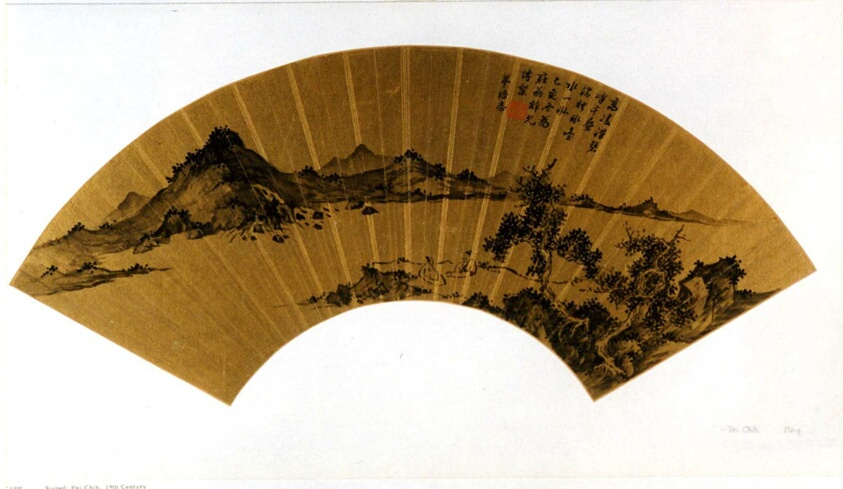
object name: Painting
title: Landscape 山水扇面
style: Chinese (culture or style)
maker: Attributed to Pei Zhi 培志 (Chinese, 17th century)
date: Ming dynasty (1368–1644), 17th century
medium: Folding fan mounted as an album leaf; ink on gold paper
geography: China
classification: album leaf; fan; painting; asian art